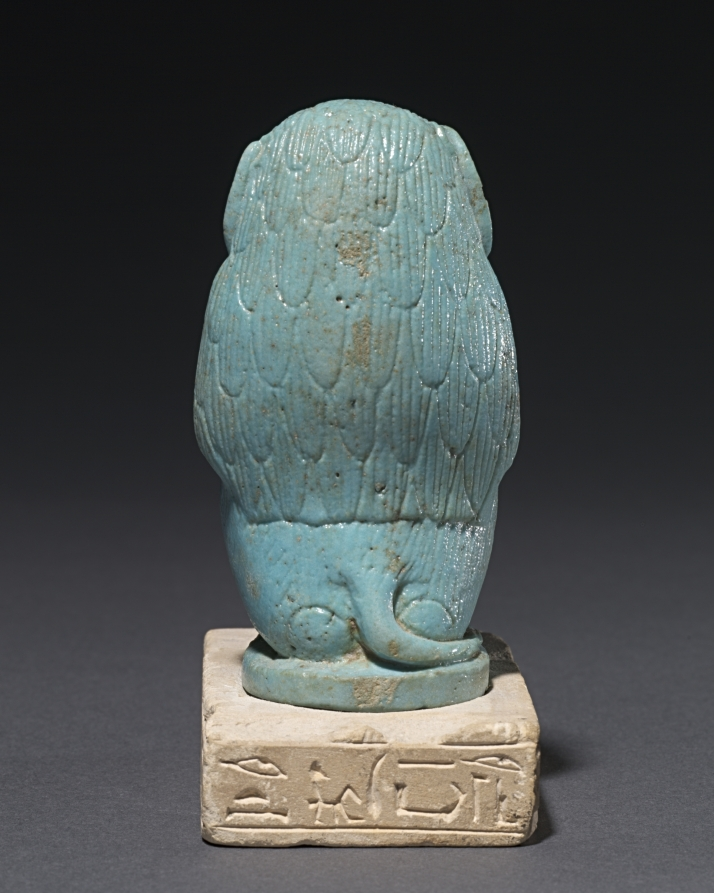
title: Baboon on a Limestone Base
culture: Egypt, Late period (715–332 BCE), Dynasty 30–Greco-Roman period (332 BCE–395 CE), Ptolemaic dynasty (305–30 BCE)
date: 380–30 BCE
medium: pale turquoise faience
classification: Sculpture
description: This finely carved Papio hamadrayas baboon squats low on a base, hands on knees in a traditional pose, copied from nature. Mane and mantle are incised with a scalloped pattern to imitate tufts of fur, and the sides of the face are stippled or dotted. The separate limestone base is ancient; judging by the inscription it does not belong with the statuette, which has been glued onto it in modern times. It reads, "Words spoken by Harpocrates, given life and health, lord of heaven, (on behalf of) Padiuser, the son of Usernakht and [mother's name uncertain]." The baboon is the sacred animal of Thoth, god of the moon and of writing, and guide of the deceased in the underworld. Thoth's cult reached immense popularity in the Late and Ptolemaic periods (the Greeks identified him with Hermes). Statuettes of Thoth as a baboon are common, although not nearly as numerous as presentations of Thoth's other animal manifestation, the sacred Ibis.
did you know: The statuette is made from Egyptian faience and is glazed with a pale, semigloss turquoise.